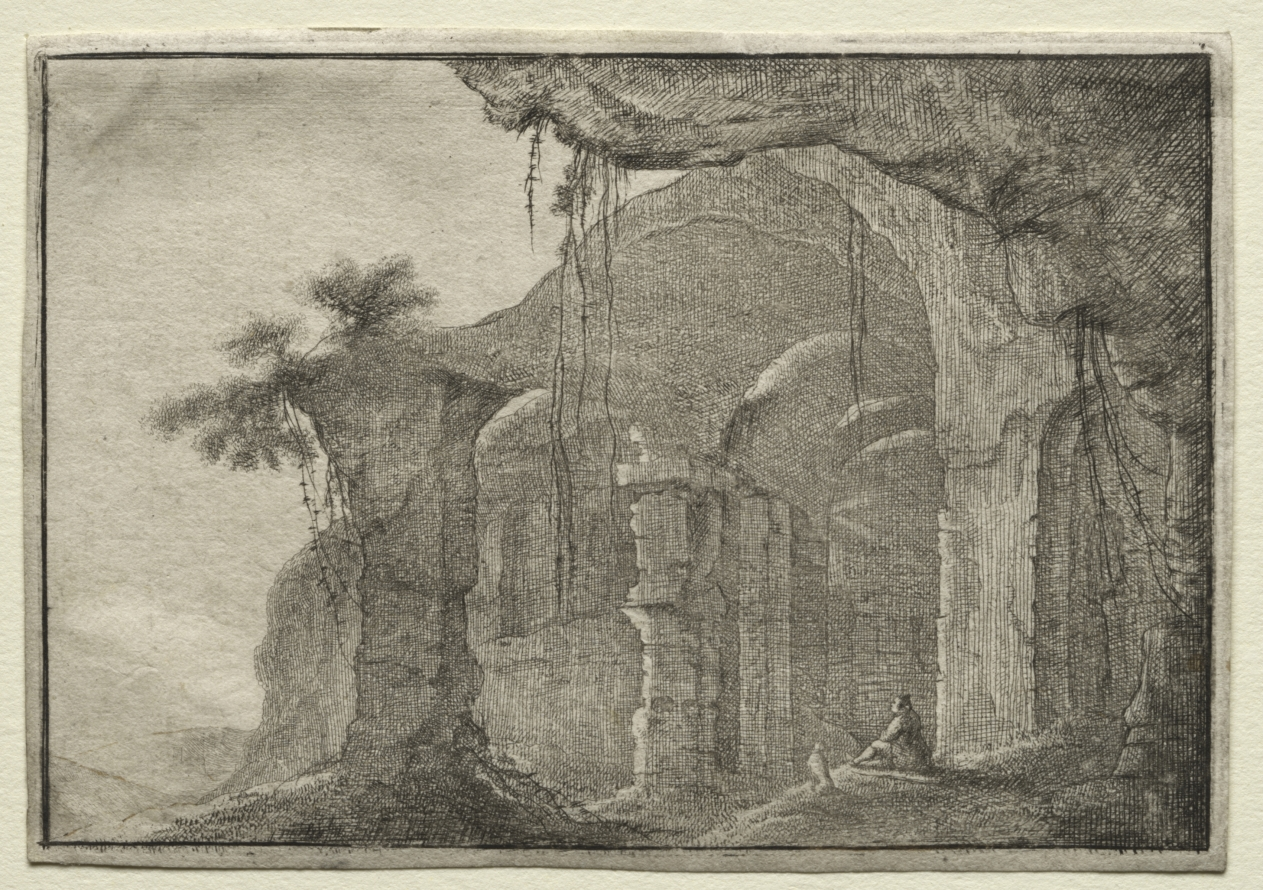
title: Ruins of an Amphitheatre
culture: Flanders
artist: Gillis Neyts (Flemish, 1623?–1687)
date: 1643–81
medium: etching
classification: Print